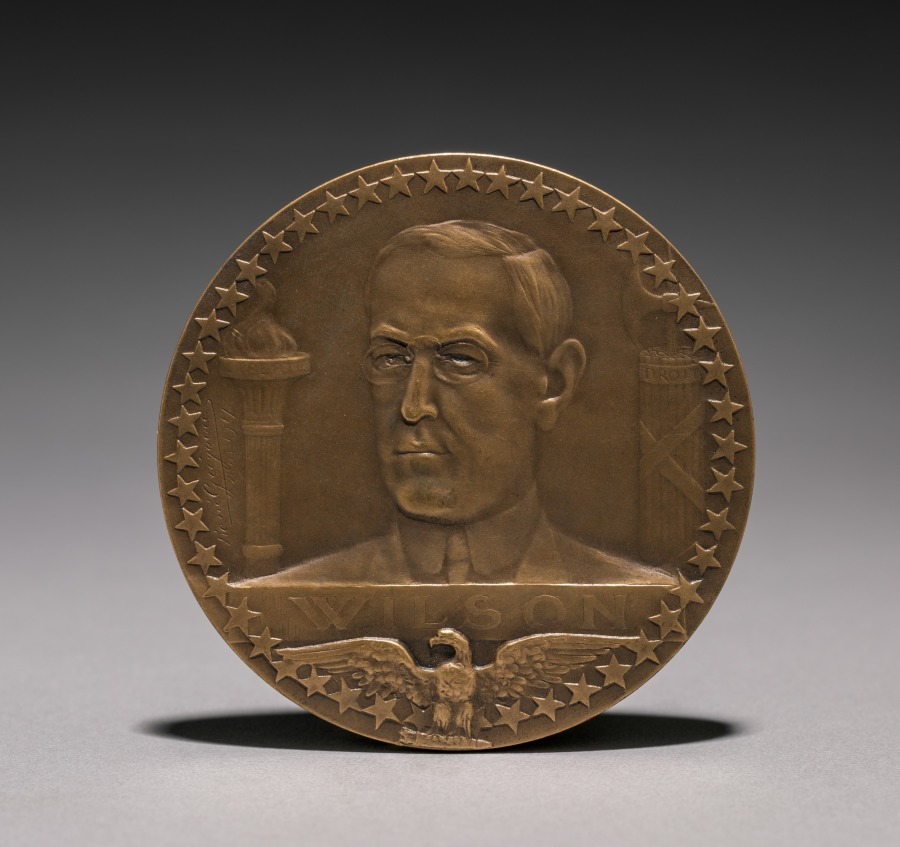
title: Medal (obverse)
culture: France, 20th century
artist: René Grégoire (French, 1871–1945)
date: 1914–1918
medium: bronze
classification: Metalwork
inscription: "Wilson."